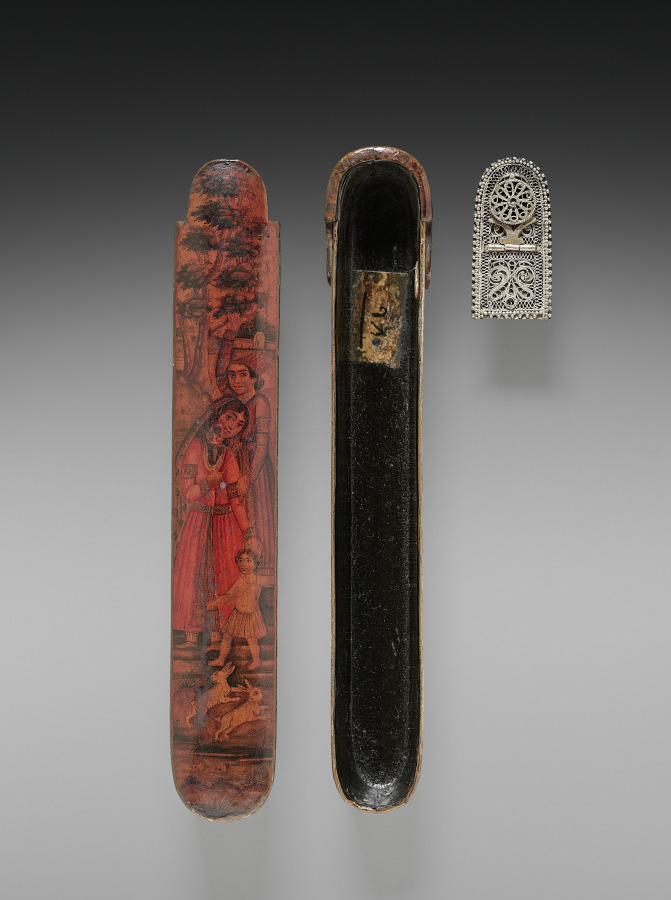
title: Pen and Ink Box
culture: Iran, Qajar period (1779-1925)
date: 1800s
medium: lacquer over papier maché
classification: Lacquer